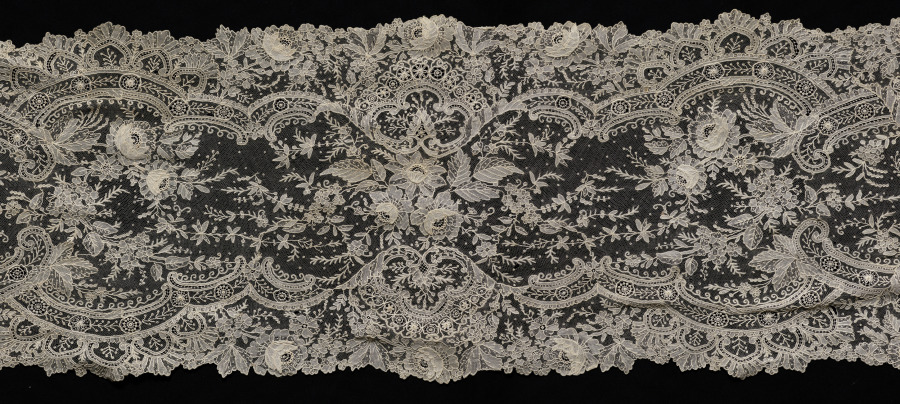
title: Lace Scarf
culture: Flanders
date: 1800s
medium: Needle lace (Point de Gaze)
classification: Lace